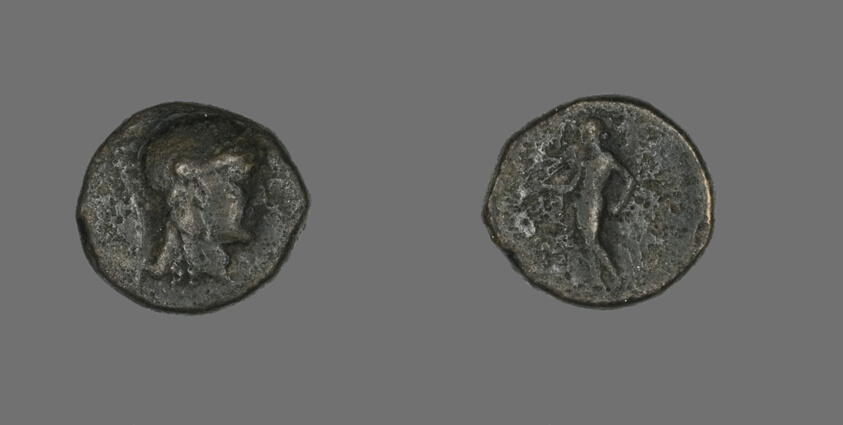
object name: Coin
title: Coin Depicting the Goddess Athena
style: greek, ancient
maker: Greek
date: 246-225 BCE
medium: Bronze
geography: Greece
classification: coin; ancient art